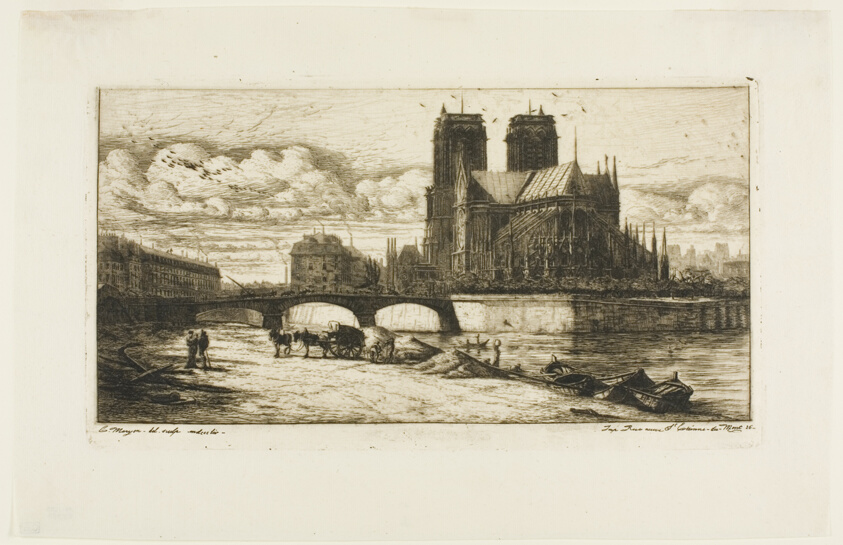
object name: Print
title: The Apse of Notre-Dame, Paris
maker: Charles Meryon (French, 1821-1868)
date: 1854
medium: Etching and drypoint ivory laid paper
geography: France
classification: etching; print; prints and drawing